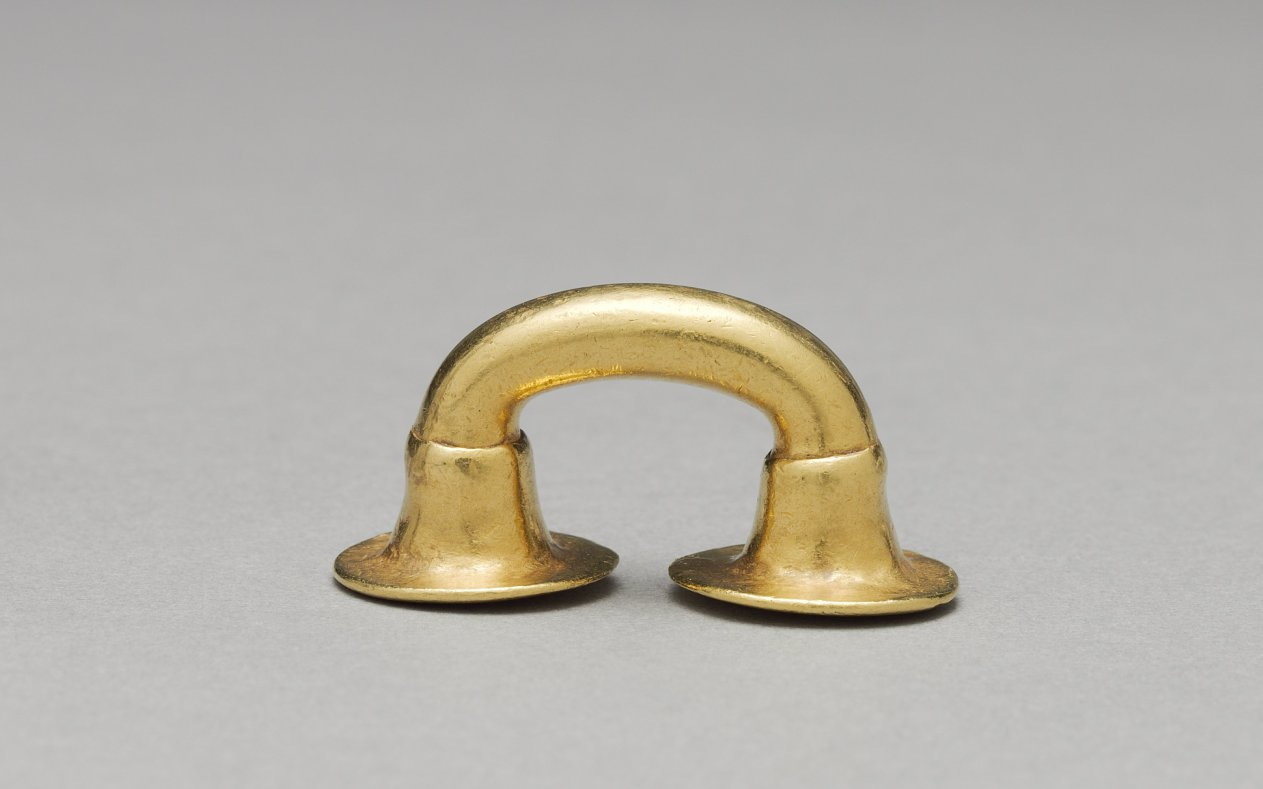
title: Nose Ornament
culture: Colombia, Sinú style, 5th-11th century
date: c. 400–1000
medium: hammered gold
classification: Jewelry